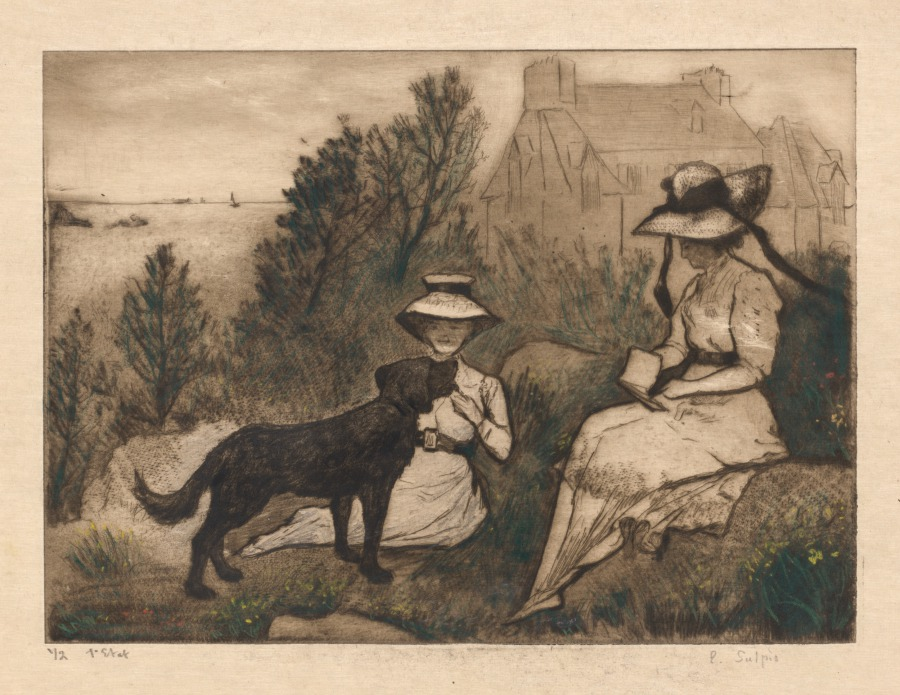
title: Au Jardin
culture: France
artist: Emile Jean Sulpis (French, 1856–1943)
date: c. 1900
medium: Etching and roulette with hand coloring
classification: Print